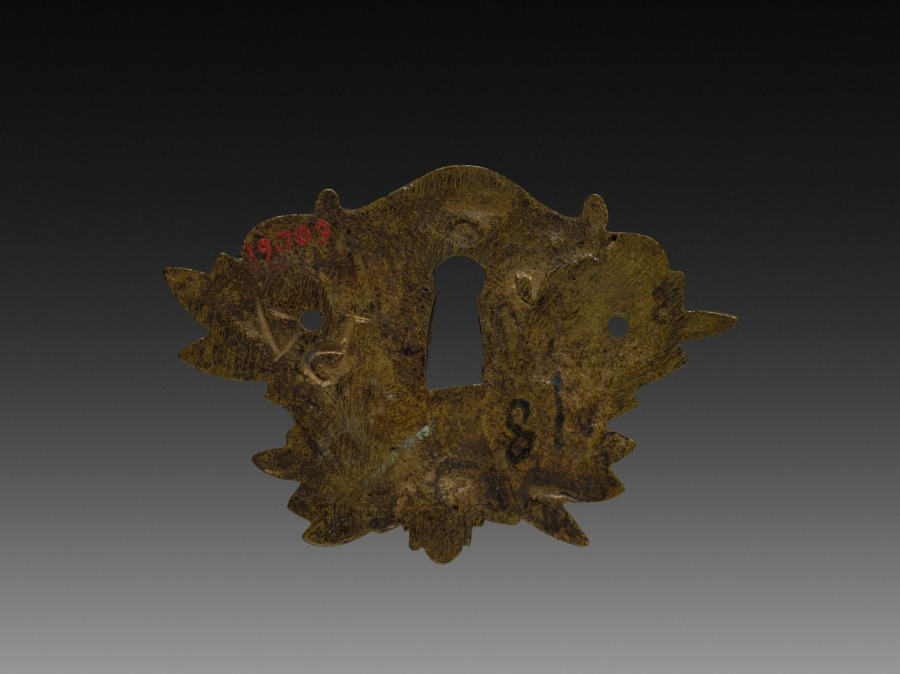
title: Ornamental Detail for a Keyhole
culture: France, 18th century, period of Louis XV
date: mid-1700s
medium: gilt bronze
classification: Metalwork